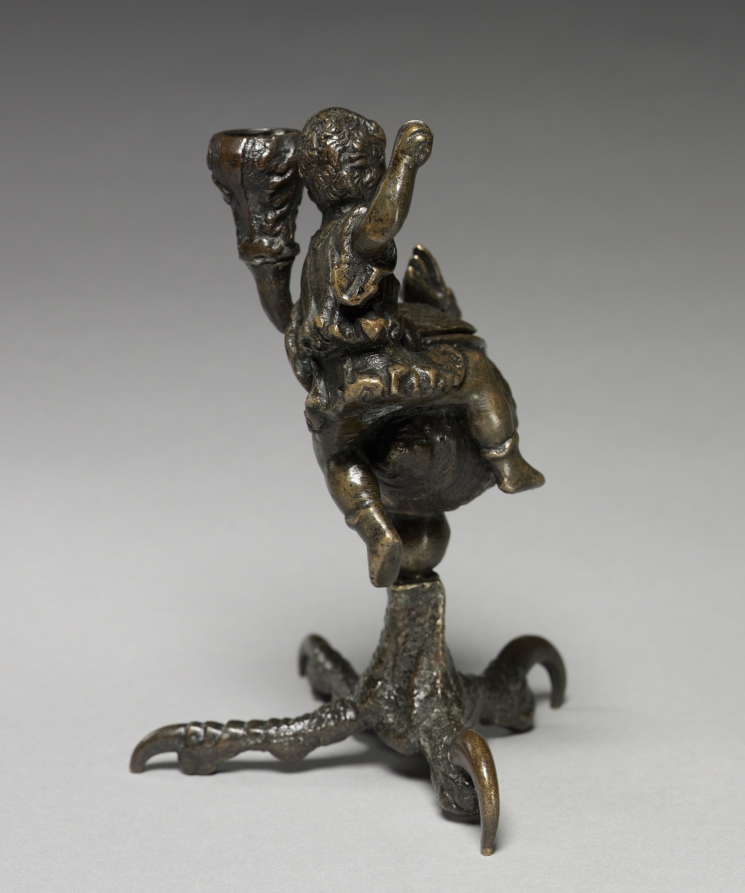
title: Inkwell and Candlestick with the Infant Hercules Killing the Serpents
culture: Italy, Ravenna, 16th century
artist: workshop of Severo da Ravenna (Italian, c.1496–c.1543)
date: c. 1510–20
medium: bronze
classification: Sculpture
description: In the early 1500s, Padua, a center of strong humanist traditions, encouraged the revival of classicism, and artists took their cues from descriptions in the works of classical authors. Classical small-scale bronzes grew in demand, and in response, the city's bourgeoning foundries produced a varied and extensive supply of small statues. Like many early Paduan bronzes, this work's utilitarian function—used to hold ink and to supply light—is complimented by its ornamental value. The base consists of an eagle claw, cast from life, supporting an equally realistic nautilus shell. Though medieval artists had occasionally used seashells to hold paints, the shell inkwell, whose small size makes it rather impractical to use, was a motif particular to Padua. Perched upon the shell is most likely Hercules, the son of Zeus. Perhaps aided by a staff (now missing) he is poised to strike a serpent, which according to myth was sent by Hera, the jealous wife of Zeus, to kill him. The dramatic opposition of hero and monster enhances the connection to the classical past, further meeting the desires of the educated patrons of Padua.